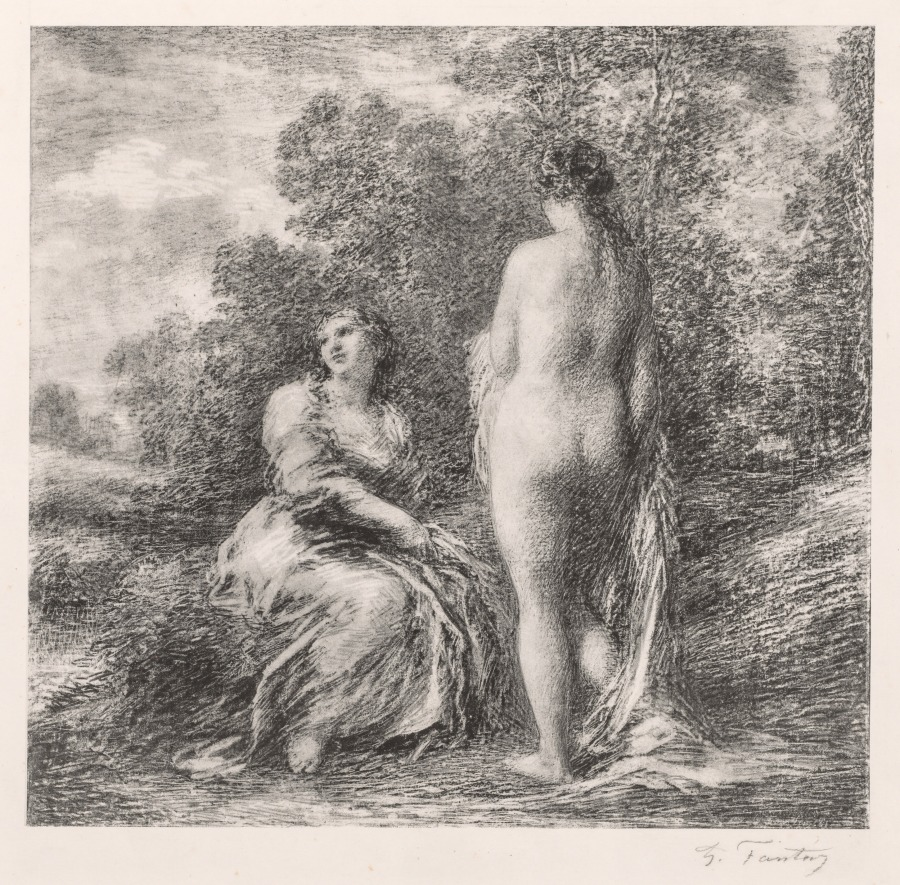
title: Bathers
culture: France, 19th century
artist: Henri Fantin-Latour (French, 1836–1904)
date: 1881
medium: lithograph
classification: Print